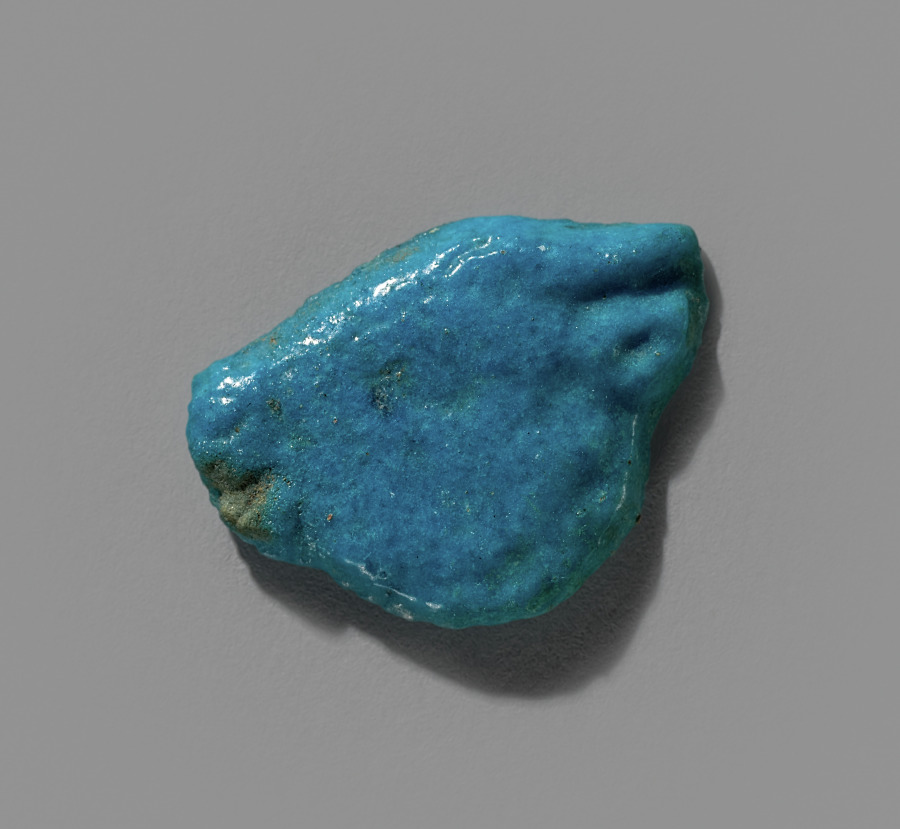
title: Food Model Amulet: Calf's Head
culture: Egypt, New Kingdom (1540–1069 BCE), Dynasties 19–20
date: 1295–1069 BCE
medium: turquoise faience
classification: Amulets